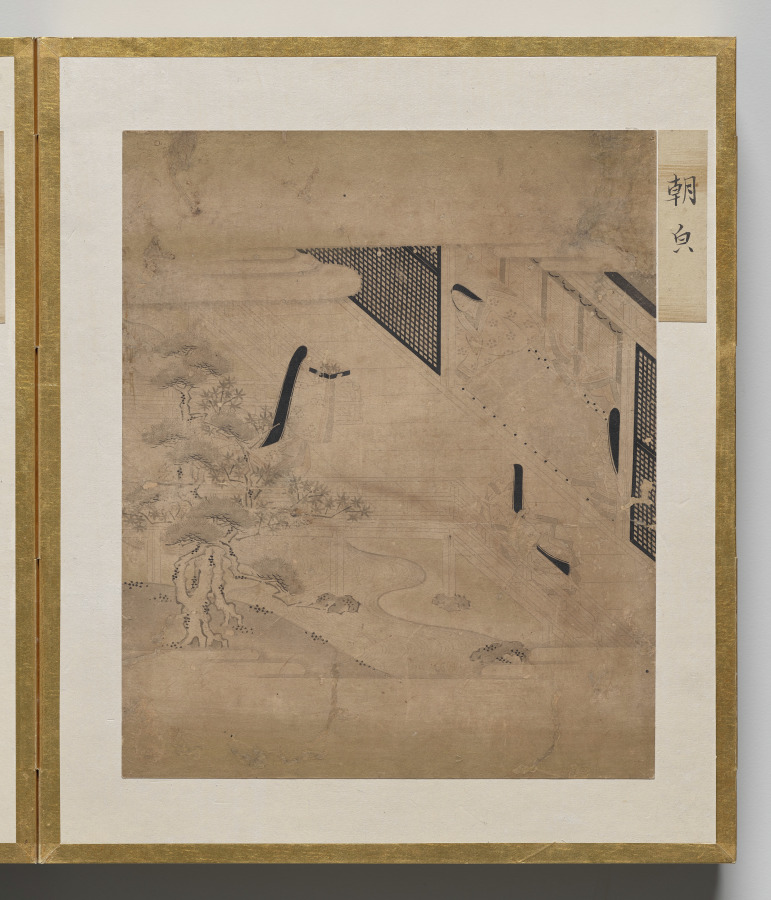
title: Morning Glory from Album of Illustrations for the Tale of Genji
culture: Japan, Edo period (1615–1868)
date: 1600s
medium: painting in an accordion-style album; ink, light color, and gold on paper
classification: Bound Volume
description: This album contains illustrations for the classic literary work the Tale of Genji, authored in the 1000s by Murasaki Shikibu, an aristocrat of the Heian period (794–1185) court. The scenes are painted in the “white drawing” (hakubyō) mode, in which a fine ink line is used to depict figures and spaces with great subtlety, punctuated only occasionally by traces of red pigment for a character’s lips, a detail of a garment, or a decorative element. These two scenes illustrate episodes from the chapters “Thin Veil of Cloud” (Usugumo) and “Barrier Gate” (Sekiya).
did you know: The illustrations are identified by chapter title in cartouches to the upper right of the paintings.